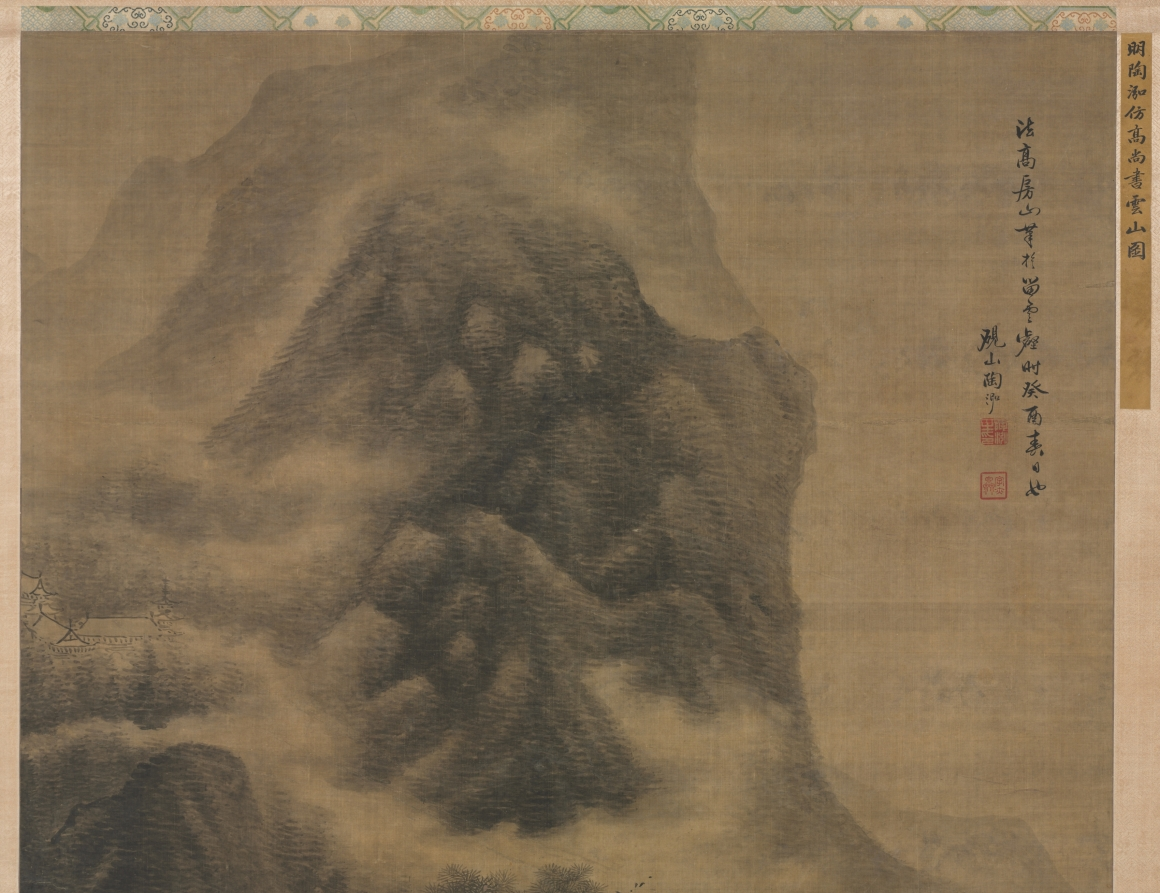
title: Clouds Visiting a Mountain Retreat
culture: China, Ming dynasty (1368–1644)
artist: Tao Hong (Chinese, active c. 1610–1640)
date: 1633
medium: Hanging scroll; ink on silk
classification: Painting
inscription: Artist's inscription, signature and two seals: Imitating Kao Fan-shan's [Kao K'o-kung's] brush at Liu-yün-ho [Valley of Lingering Clouds] during a spring day in the kuei-yu year [1633]. Yen-shan, T'ao Hung [seals] T'ao Hung chih-yin; tzu Ch'iu-shui. (Translated by Wai-Kam Ho)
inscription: 1 additional seal unidentified.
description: Little is known about Tao Hong who settled in Nanking in the latter part of his life. His son was a friend of the leading Nanjing school artist Gong Xian (on display nearby). When the Ming dynasty collapsed in 1644, Tao joined the loyalist resistance in Yunnan province. By 1645 the Manchu invaders had defeated the Yunnanese forces, prompting Tao to flee to Burma, where he died shortly thereafter. Only five of Tao Hong’s works are known to exist, of which this painting is the largest.